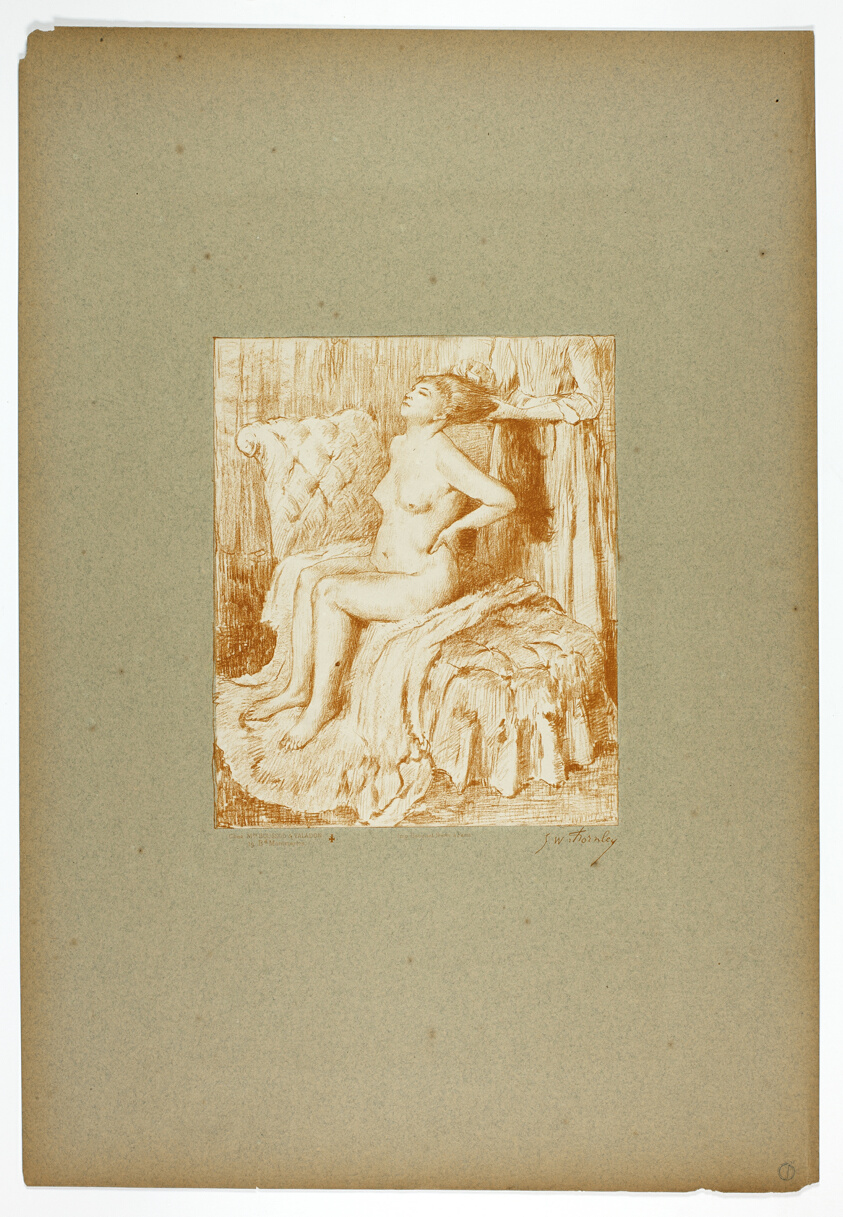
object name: Print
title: Dancer Dressing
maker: Georges-William Thornley (French, 1857-1935); after Edgar Degas (French, 1834-1917); printed by Atelier Becquet (French, 19th century); published by Boussod, Valadon, & Company (French, 18th-19th century)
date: 1889–90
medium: Lithograph on paper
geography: France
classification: lithograph; print; prints and drawing